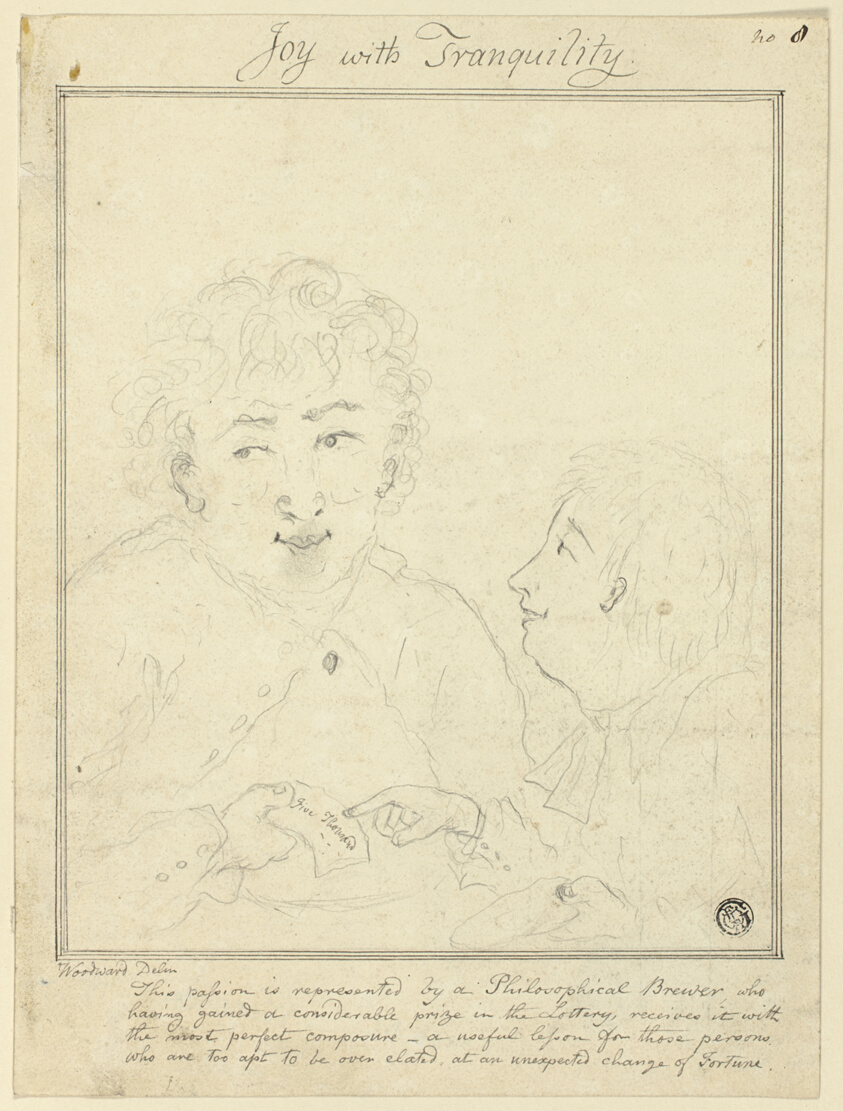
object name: Drawing and Watercolor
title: Joy with Tranquility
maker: George Woodward (English, c. 1760-1809)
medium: Graphite, with pen and brown ink (recto), and graphite tracing (verso), on ivory wove paper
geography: England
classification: graphite; drawings (visual works); prints and drawing